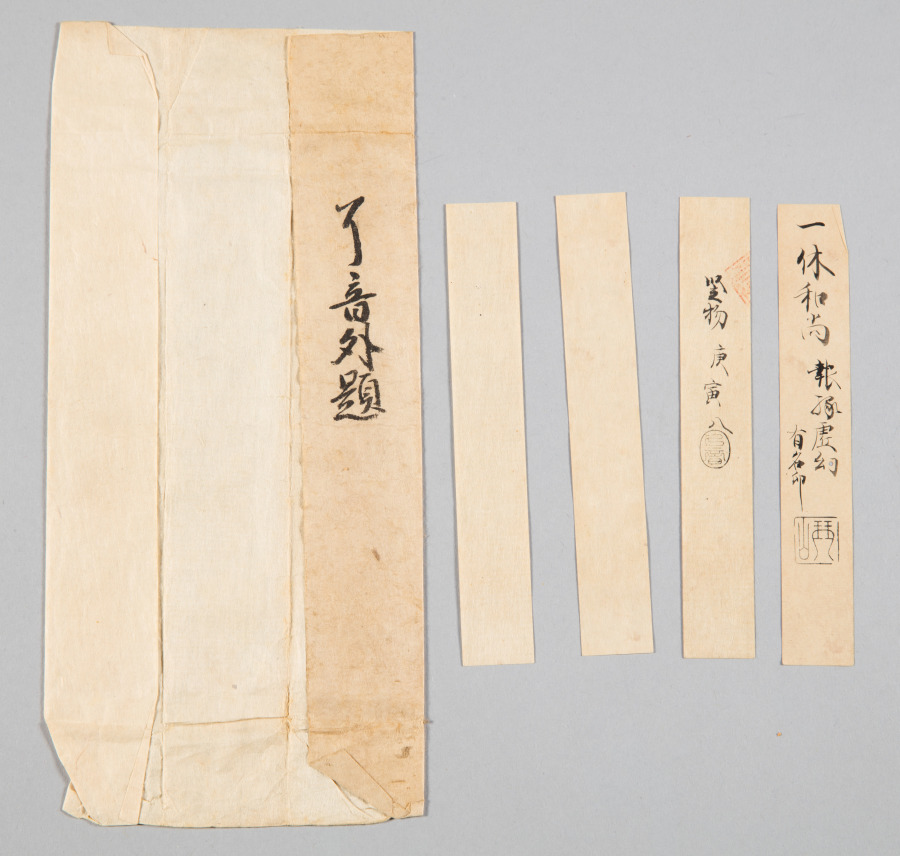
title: Reflections of Priest Foyen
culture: Japan, Muromachi period (1392–1573)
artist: Ikkyū Sōjun (Japanese, 1394–1481)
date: 1400s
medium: hanging scroll, ink on paper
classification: Painting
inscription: signed: "Kido nanasei son, Ikkyūshi Sōjun sho (Written by Ikkyū Sōjun, the seventh generation of Kido)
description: Left by his mother at a small Zen temple in Kyoto at the age of six, Ikkyu later drew on his early studies and experiences for his writings, which focused on his keen interest in the Chinese classics. Poetry in particular was a favorite subject and images from classical poetry or passages from favorite poems or commentaries frequently provided Ikkyu with the core ideas for his own work. A rare example of his calligraphy, this narrow scroll contains a verse in eight phrases, each comprising four characters. The whole verse is organized in three towering lines of brusque, emphatic calligraphy augmented by Ikkyu's signature-the two lines of running script in the lower left corner. The text refers to a passage included in the Chronicle of the Zen Sect that contains a cautionary reminder attributed to the legendary Chinese monk Foyen Qingyuan (1067-1120), long revered in Japan. The initial phrase begins: "Life is a mirage."